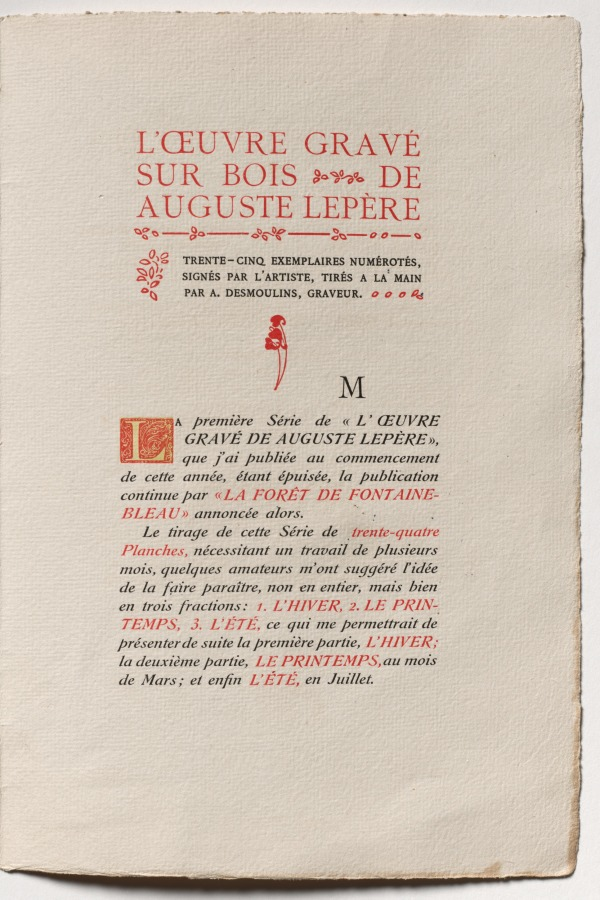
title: Fontainebleau Forest: Ad for "Fontainebleau Forest" (La Forêt de Fontainebleau)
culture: France, 19th century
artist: Auguste Louis Lepère (French, 1849–1918)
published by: A. Desmoulins, Published in Revue Illustrée, 1887–90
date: 1890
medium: pamphlet, color woodcut on cover, related to bound volume with 34 wood engravings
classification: Bound Volume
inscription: In block within image, in green ink, printing in letterpress: A. LEPÉRE; in plate, within image, in black ink: LA FORÊT DE FONTAINEBLEAU / Gravures originals de A. Lepère; in plate, within image, in red ink: Chez A. DESMOULINS, GRAVEUR / BOULEVARD JOURDAN - 60 -- / PARIS; below image, in green ink: P.D. SC.